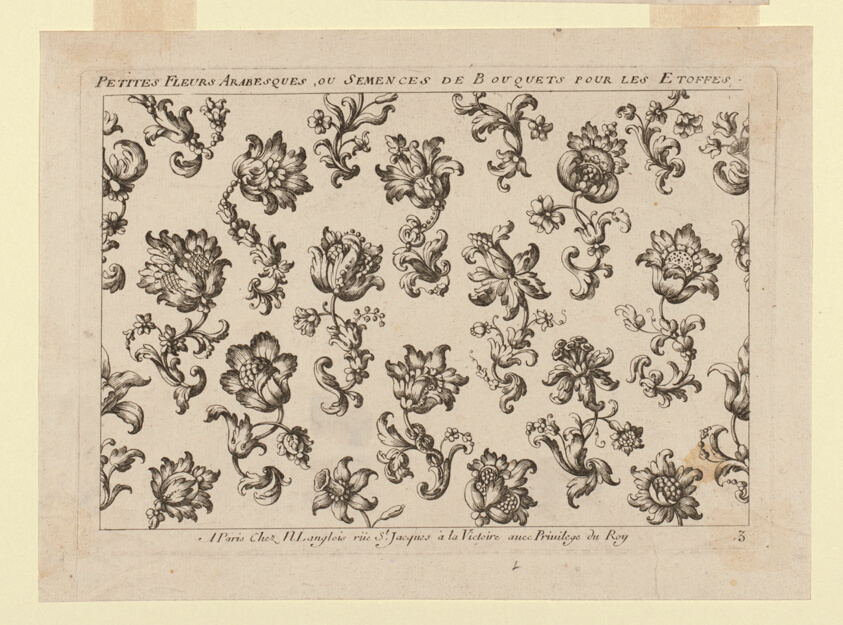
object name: Textile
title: Design for an Embroidered or Woven Textile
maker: France, Paris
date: 17th century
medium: Paper, printed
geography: France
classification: textile; accessory - paper design; accessories (object genre)